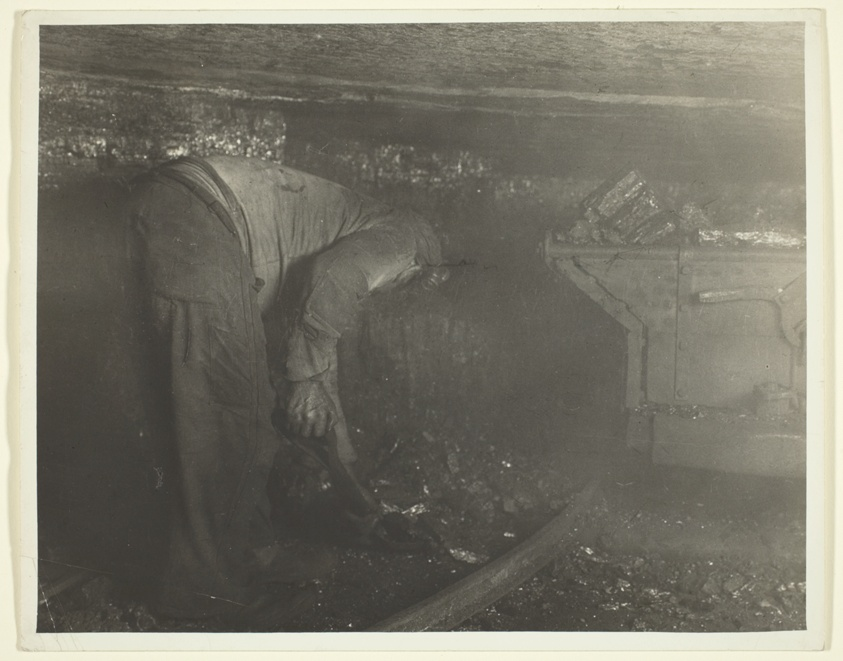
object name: Photograph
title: Pennsylvania Coal Mine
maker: Lewis Wickes Hine (American, 1874–1940)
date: 1910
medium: Gelatin silver print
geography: United States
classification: gelatin silver (developing-out-paper) pr; photographic process; photography; photograph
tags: Collected by Hugh Edwards